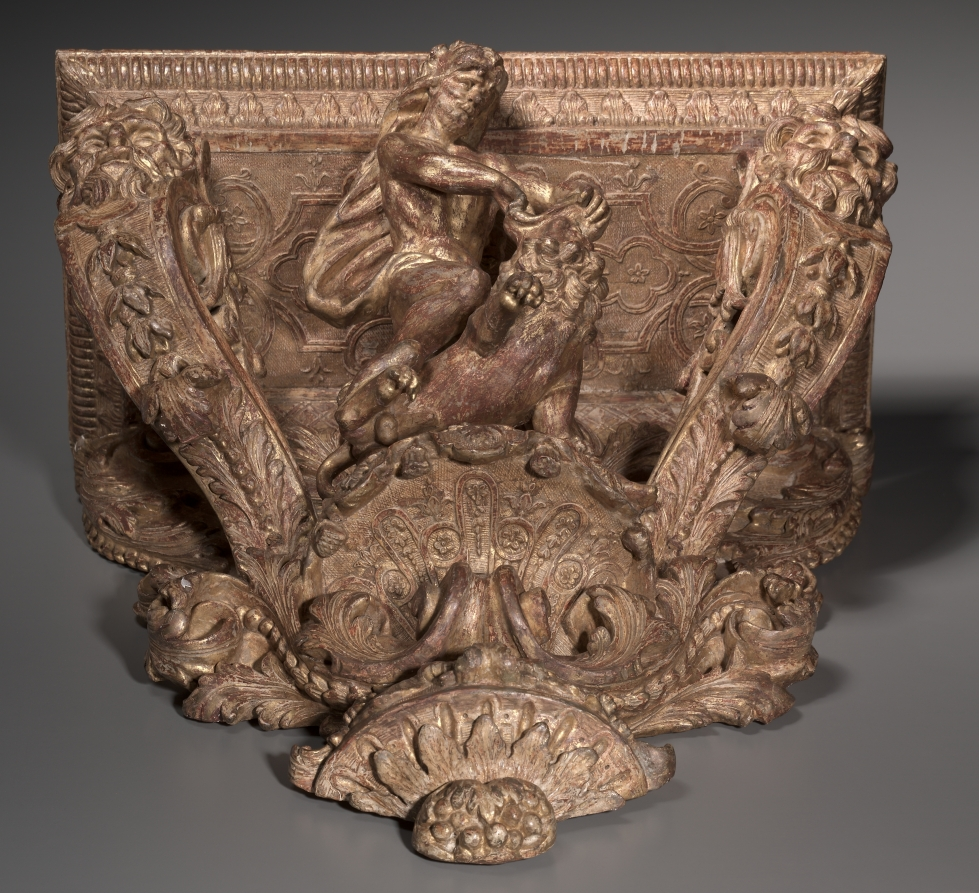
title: Wall Bracket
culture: France, 17th century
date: c. 1650–75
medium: carved and gilt wood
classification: Furniture and woodwork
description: The carved decoration depicts Hercules and the Nemean lion.